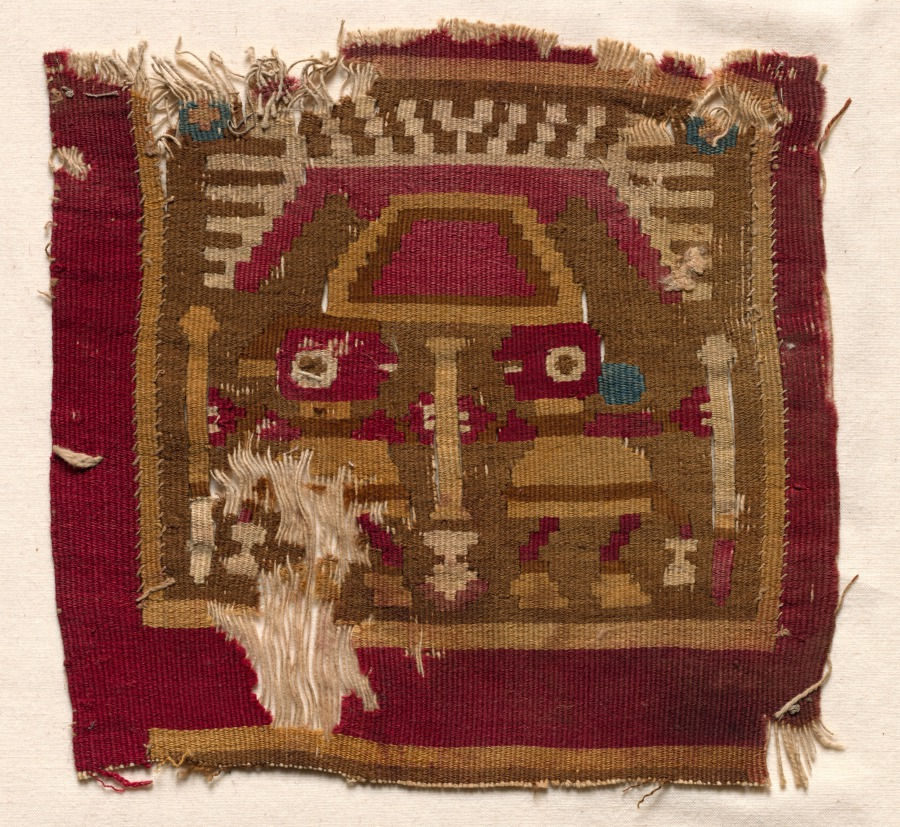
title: Textile Fragment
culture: Peru, North Coast, 9th-12th Century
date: 800–1100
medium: slit tapestry, cotton warp, camelid-fiber wefts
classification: Textile